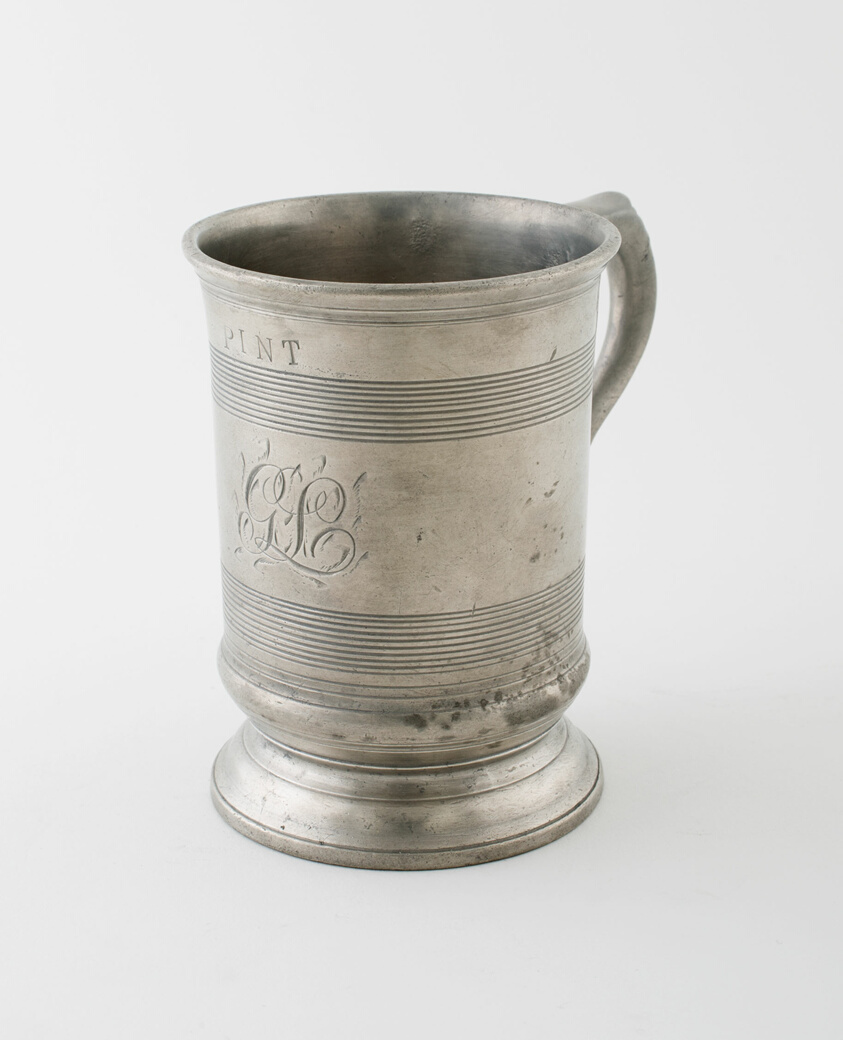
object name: Metalwork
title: Pint Measure with Double C Handle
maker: England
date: 19th century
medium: Pewter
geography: England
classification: pewter; metalwork; european decorative arts